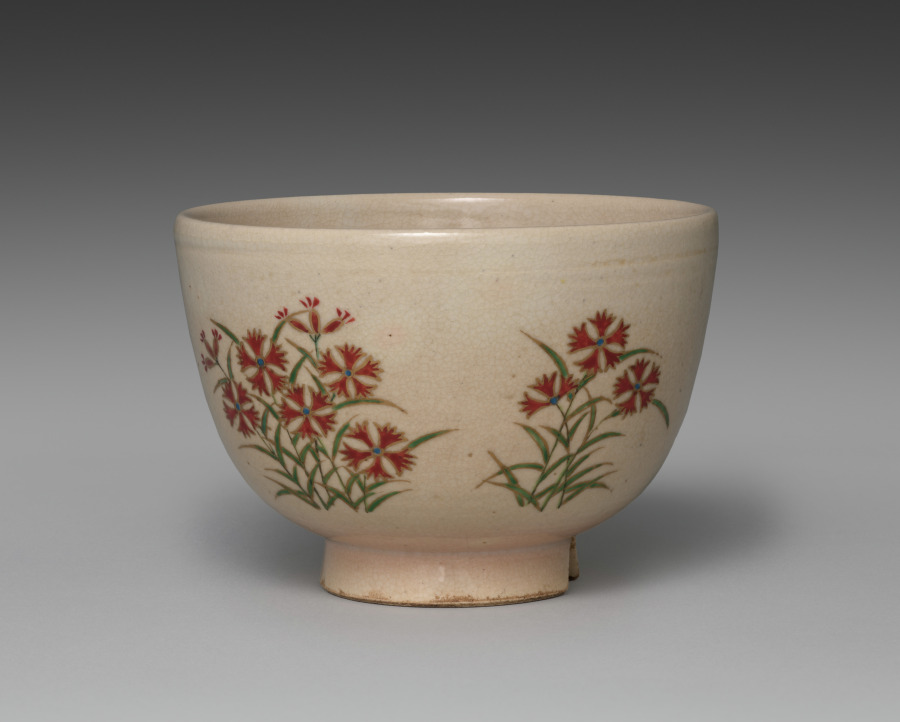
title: Teabowl with Pinks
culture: Japan, Meiji period (1868–1912)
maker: Seifū Yohei III (Japanese, 1851–1914)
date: 1893–1914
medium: Stoneware with crackled glaze and overglaze color enamel and gold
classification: Ceramic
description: This teabowl, for use in chanoyu, is a good example of Yohei III’s mastery of the techniques involved in producing Kyoto ware. The painting of the pinks, with their blue centers, bright red petals, and green leaves, is carefully controlled with crisp gold borders throughout. There is crackling in the transparent glaze and obvious, thick dripping of the milky glaze over the outside of the mouth of the bowl. The pink spots would have appeared in the clay during firing, and the bottom of the inside of the bowl is entirely pink. A triangular wedge has been cut away from the foot, and a gently impressed band rings the bowl beneath the rim.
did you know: The vessel comes with a bespoke brocade pouch with a silk fastening cord, as is customary for Japanese teabowls.